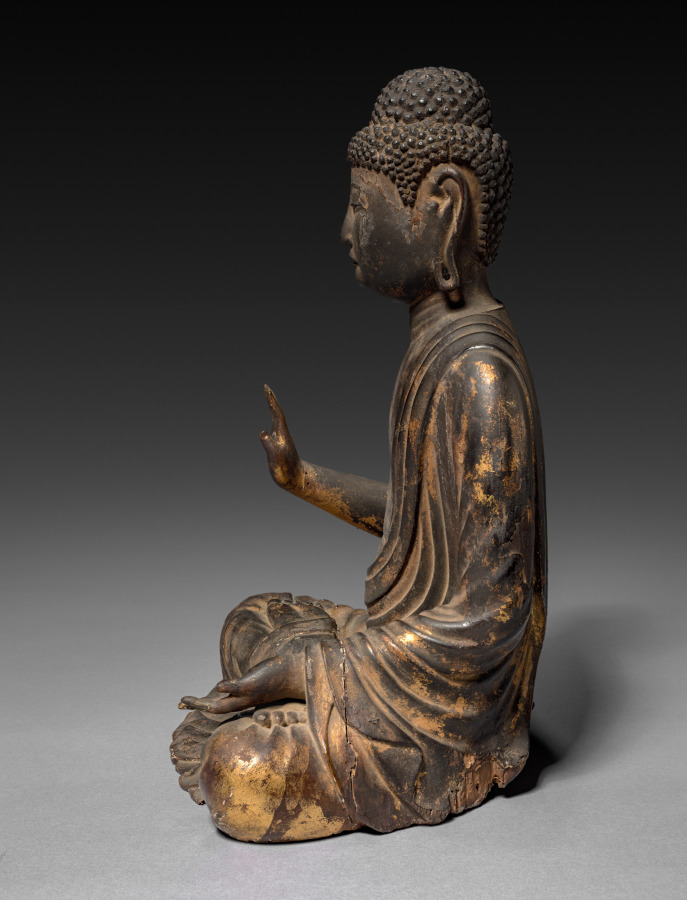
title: Shakyamuni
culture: Japan, Meiji period (1868–1912)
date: c. 1868–1912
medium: Wood with traces of lacquer and gilding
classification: Sculpture